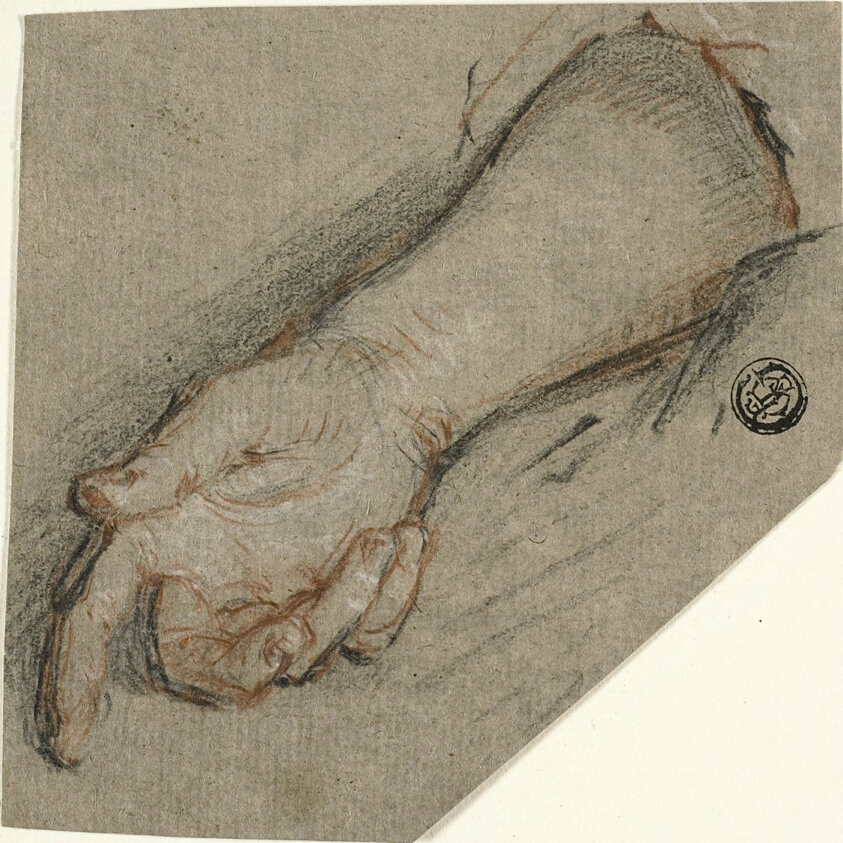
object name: Drawing and Watercolor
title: Back of Hand and Forearm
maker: Antoine Coypel (French, 1661-1722)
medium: Red and black and white chalk, on brown laid paper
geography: France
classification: chalk; drawings (visual works); prints and drawing